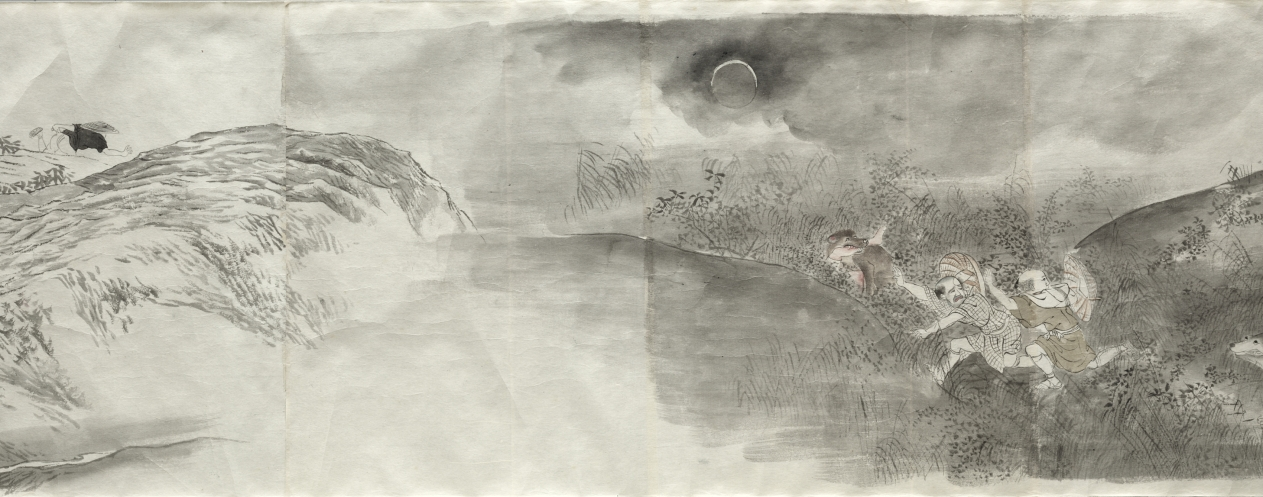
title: Sketch Copy of Natural Disasters, from the Seven Fortunes and Misfortunes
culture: Japan, Edo period (1615–1868) to Meiji period (1868–1912)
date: after 1773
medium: handscroll; ink and color on paper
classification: Painting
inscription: Signed: Gettcho; dated 1773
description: This unmounted handscroll is a copy of the first of a three-scroll set painted by Maruyama Ōkyo (1733–1795) for Buddhist monk Yujō (1723–1773). It depicts people's unfortunate encounters with forces of nature from wind to beasts. Ōkyo's realistic, contemporary imagery was meant to evoke a sense of recognition and empathy in viewers, shocking them into avoidance of possible punishments.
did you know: Notations that appear throughout the scroll indicate colors and other details of the original painting.